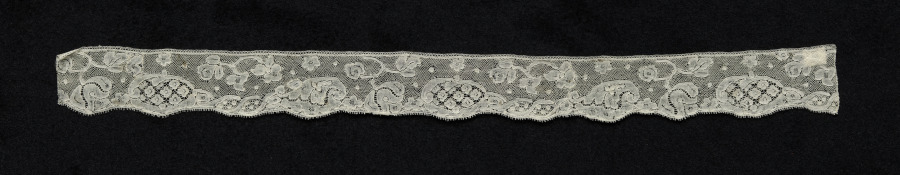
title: Lace Edging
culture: Belgium, Mechelen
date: 1700s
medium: Linen: bobbin lace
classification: Lace